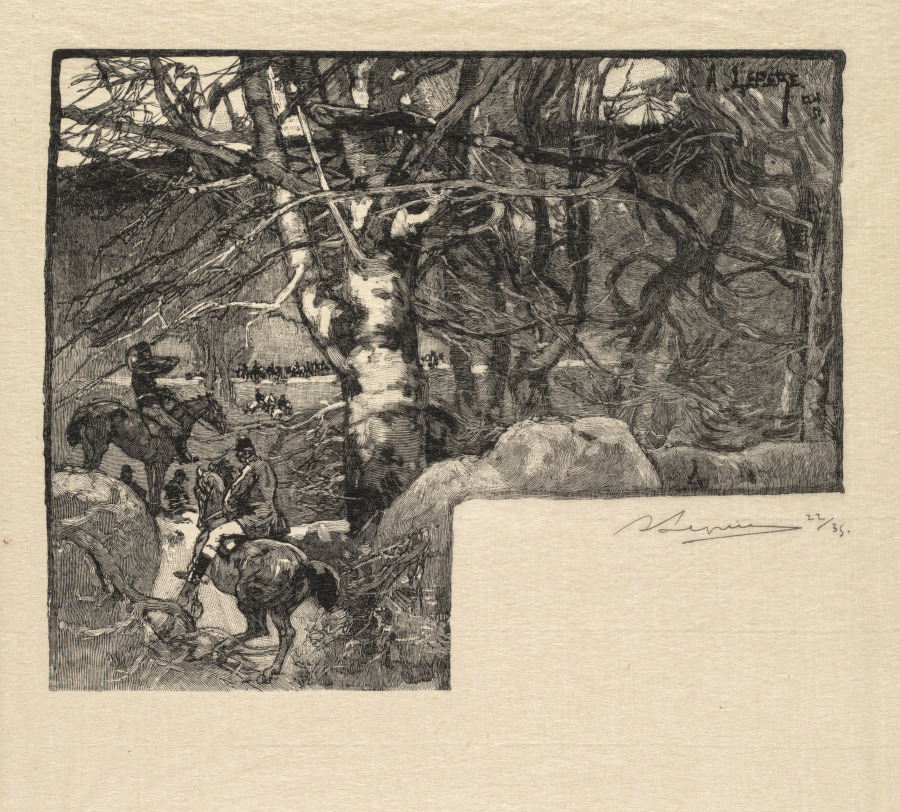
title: Fontainebleau Forest: Ride to the Hounds at Mont-Gérard (La Forêt de Fontainebleau: Une chasse au Mont-Gérard)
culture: France, 19th century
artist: Auguste Louis Lepère (French, 1849–1918)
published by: A. Desmoulins, Published in Revue Illustrée, 1887–90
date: 1890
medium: wood engraving from bound volume of 34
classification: Bound Volume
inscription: Below image, lower right, in black ink: ALepère 22/35; on window mat, lower right, in graphite: Une chasse au Mont Gérard